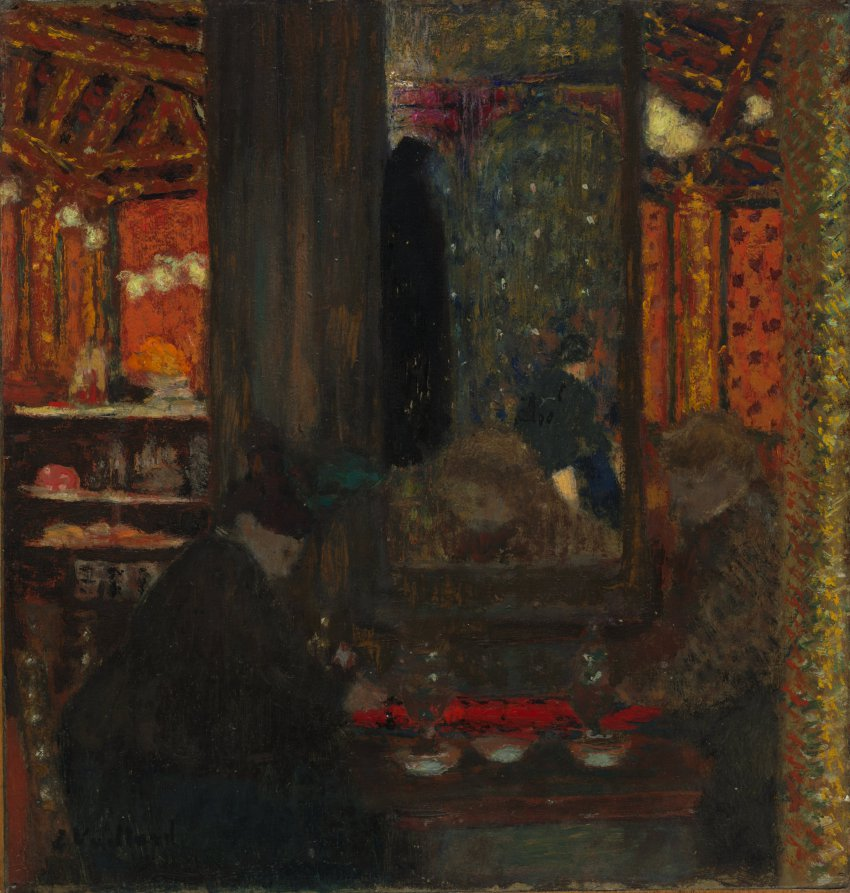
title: At the Café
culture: France, 19th century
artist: Édouard Vuillard (French, 1868–1940)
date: c. 1897–99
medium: oil on board, laid on cradled panel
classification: Painting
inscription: Signed lower left: E Vuillard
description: This scene of two women in a Parisian café has a hushed atmosphere that is heightened by the warm palette and glow of gaslight. Édouard Vuillard and Félix Vallotton were close friends and painted together in the 1890s, but Vuillard’s quiet café and Vallotton’s riotous Bistro (2020.114) could not be more different in mood.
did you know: Vuillard once said, “I don’t do portraits. I paint people in their surroundings.”